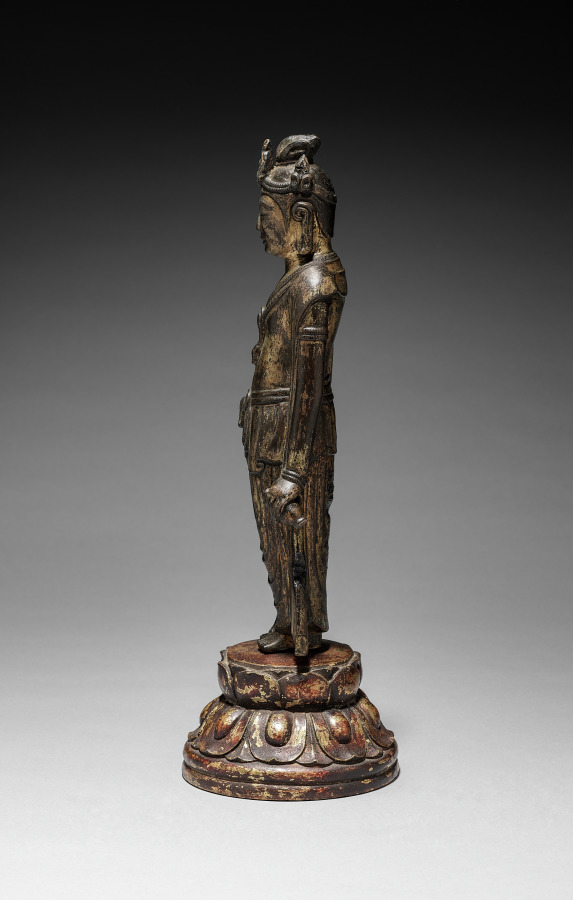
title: Kannon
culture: Japan, Asuka period (538–710)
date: mid-600s–early 700s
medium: gilt bronze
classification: Sculpture